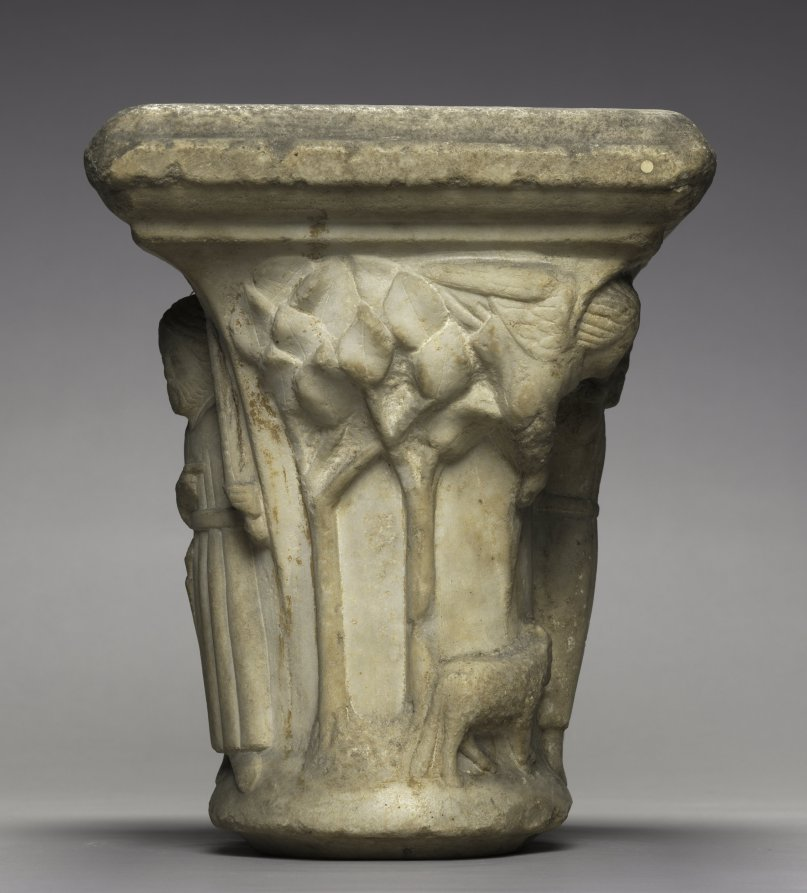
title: Engaged Capital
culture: Southern France, Abbey of Larreule, near Tarbes, 15th century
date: 1400s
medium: limestone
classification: Sculpture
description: This capital belongs to a surviving group including other architectural fragments that once decorated the cloister of the Abbey of Larreule. A cloister was a covered walkway or arcade, usually around all four sides of a square area of grass (the "cloister garth"). The seclusion of the cloister was the monks’ exclusive domain, off limits to others. Here, the monks were supposed to pray, study, meditate, and exercise in privacy and solitude. Such cloister capitals served both to instruct the monks and as a focus for their devotions. Other capitals in this series are installed in the Jardin Massey at Tarbes, near the original abbey. An arch from Larreule has been assembled with other associated French capitals at The Cloisters in New York.